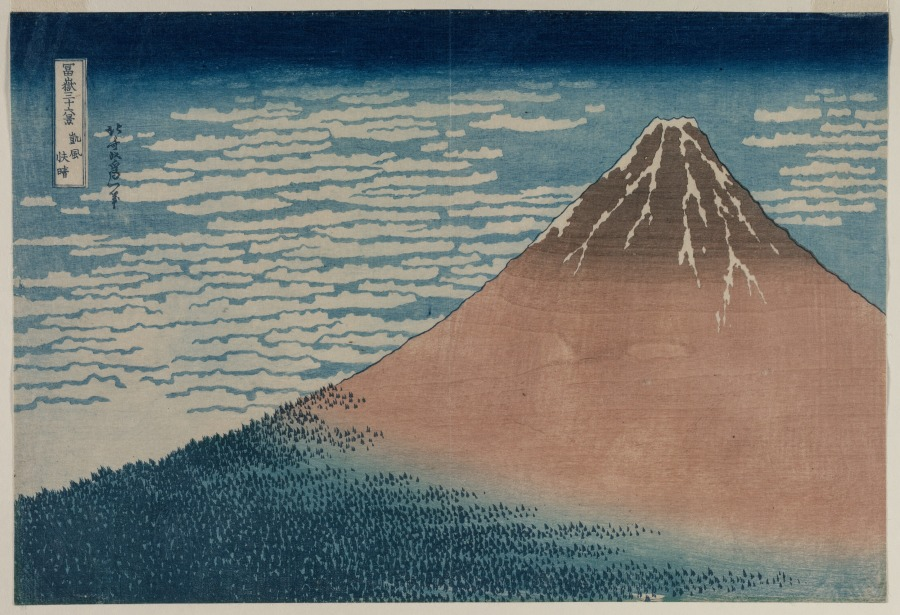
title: South Wind, Clear Sky, from Thirty-Six Views of Mount Fuji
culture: Japan, Edo period (1615–1868)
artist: Katsushika Hokusai (Japanese, 1760–1849)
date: early 1830s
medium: color woodblock print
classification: Print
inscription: Signature: Hokusai aratame Iitsu hitsu Publisher: Nishimuraya Yohachi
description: Mt. Fuji, Japan’s highest mountain, appeared in most Japanese 19th-century travel literature. Maps sometimes showed its location with a Fuji-shaped icon and indicated where travelers could get the best view of it. Between 1829 and 1833, Hokusai created a print series depicting thirty-six views of the mountain, including this one, sometimes known as “Red Fuji.” The season in this scene is a time between late summer and early autumn, when the mountain takes on a reddish hue.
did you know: During the printing process, the natural grain of the cherry wood printing block was imprinted onto the paper along with the red-colored dye.